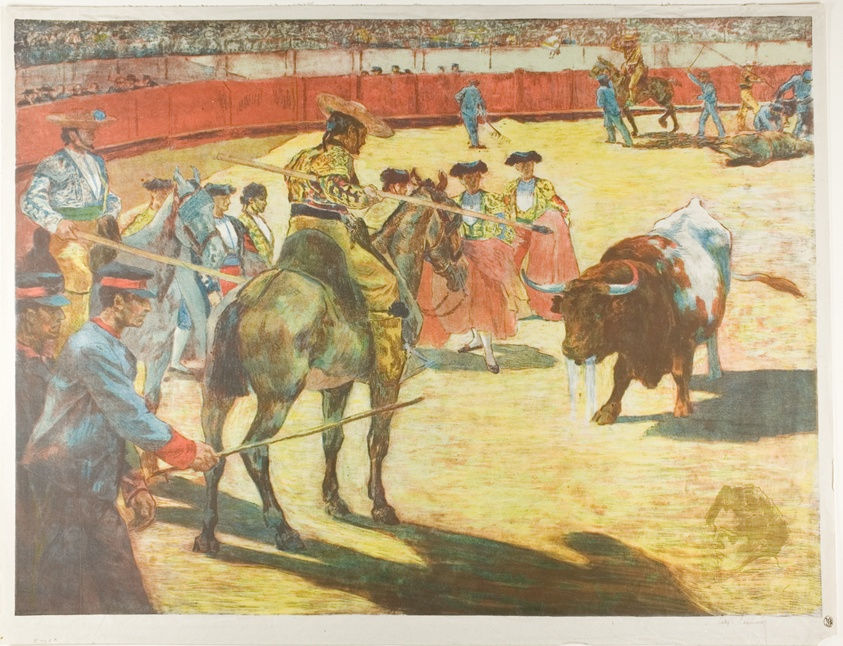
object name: Print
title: Bull-Fight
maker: Alexandre Lunois (French, 1863-1916)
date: 1897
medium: Lithograph in black, yellow, red, blue, purple-brown and pale green on grayish-ivory China paper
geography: France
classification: lithograph; print; prints and drawing